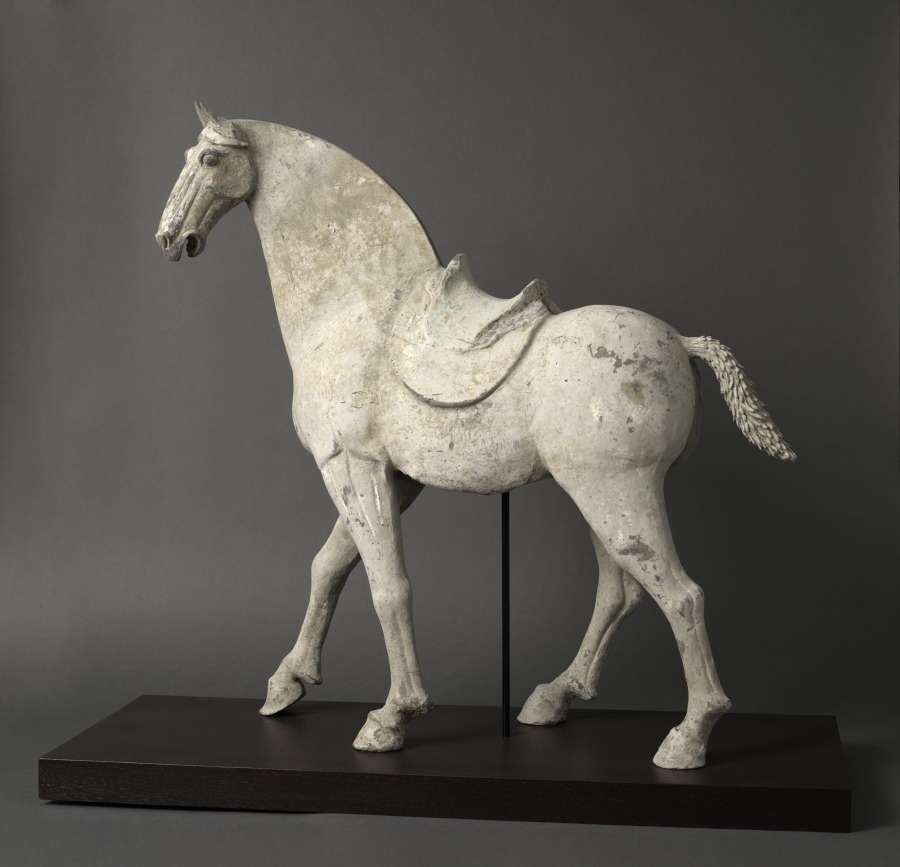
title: A Large Painted Striding Horse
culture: China, Tang dynasty (618–907)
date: 700–800s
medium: Pottery with white slip and mineral colors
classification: Ceramic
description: Horses were symbols of status and power in ancient China, used for military operations, mobility, and entertainment for the elite. Around the second century BCE onward, pottery horses began to be placed in tombs as status symbols and companions of the deceased in the afterworld. This horse is harnessed with a saddle and is exceptionally large. It presents a well-bred specimen that strides forcefully ahead.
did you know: A groove runs over the horse’s neck from its ears to the saddle, indicating that its mane and tail were once filled with real horsehair to render the sculpture more realistic.